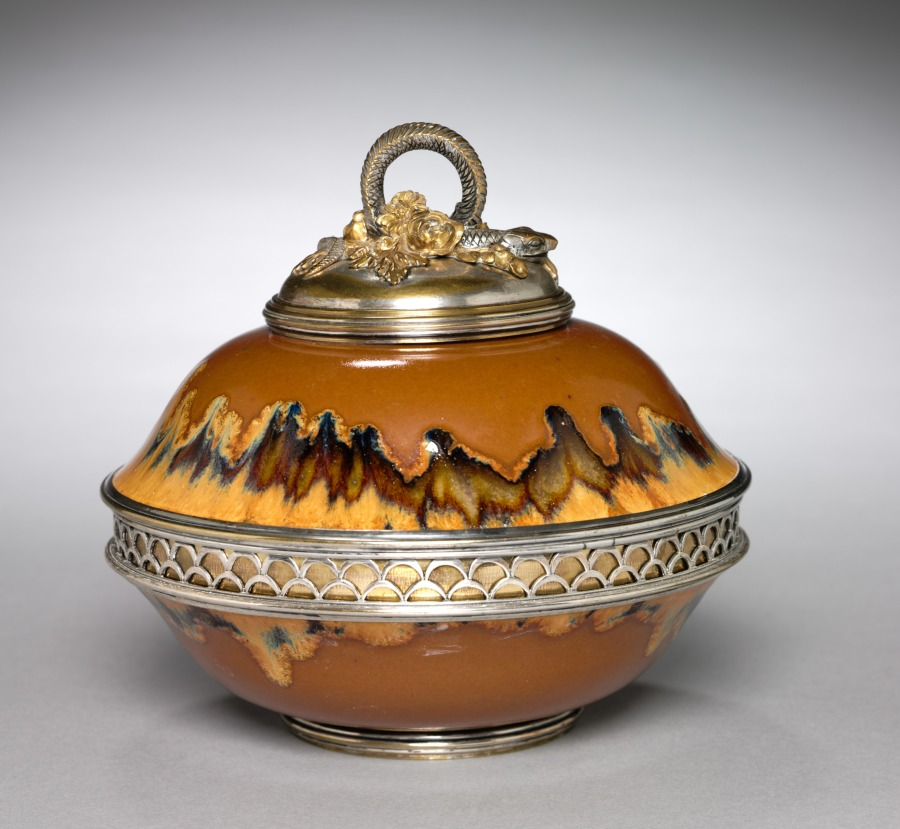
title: Covered Bowl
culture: France, late 19th-early 20th Century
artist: Auguste Delaherche (French, 1857–1940)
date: c. 1899–1900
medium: stoneware with metal mounts, silvered and gilded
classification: Ceramic